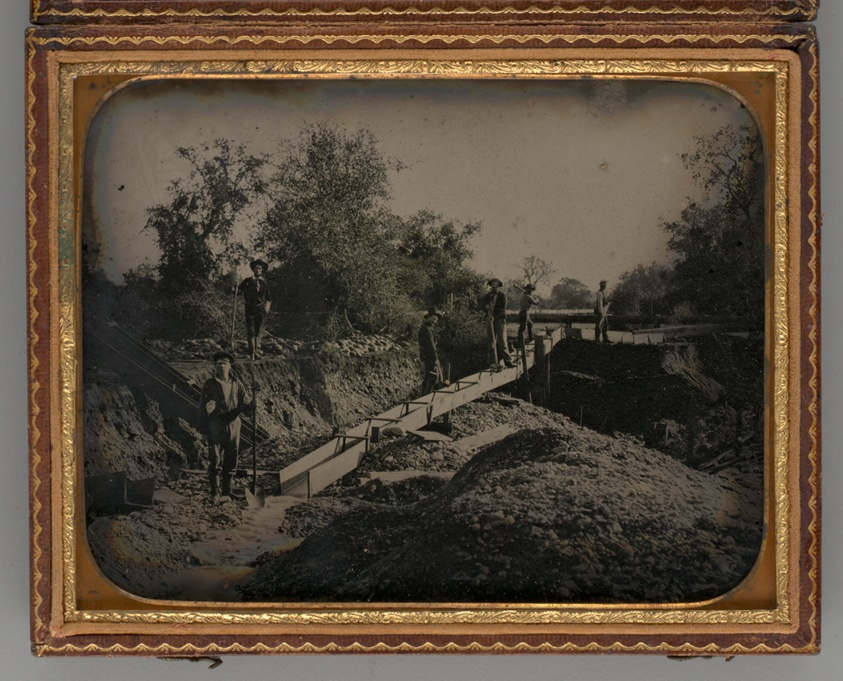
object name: Photograph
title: Untitled (Gold Mining Scene with Six Miners)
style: 19th century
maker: Unknown maker; American, 19th century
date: 1854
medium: Ambrotype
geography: United States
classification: portrait; ambrotype; portrait; photograph; photographic process; photography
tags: lundberg collection, people, gold rush, gold mining, landscapes, landscape